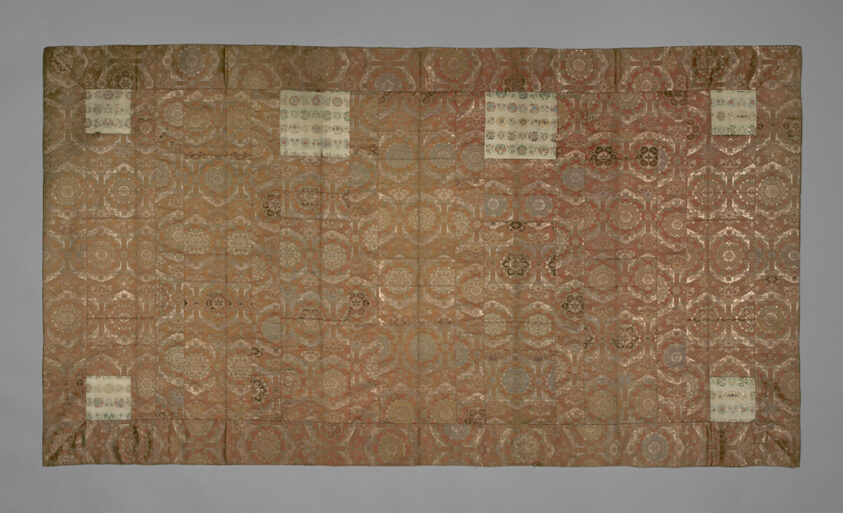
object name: Textile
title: Kesa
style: edo (japanese period), meiji, late edo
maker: Japan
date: Edo period (1615–1868), late 18th century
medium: Silk and gold-leaf-over-lacquered-paper strip, warp-float faced 2:1 'Z' twill weave with supplementary patterning and brocading wefts bound by main warps in a weft-float faced 1:2 'S' twill interlacing; cords: silk, 2:2 oblique twill interlacing; lined with silk, plain weave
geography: Japan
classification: textile; weaving; liturgical - buddhist